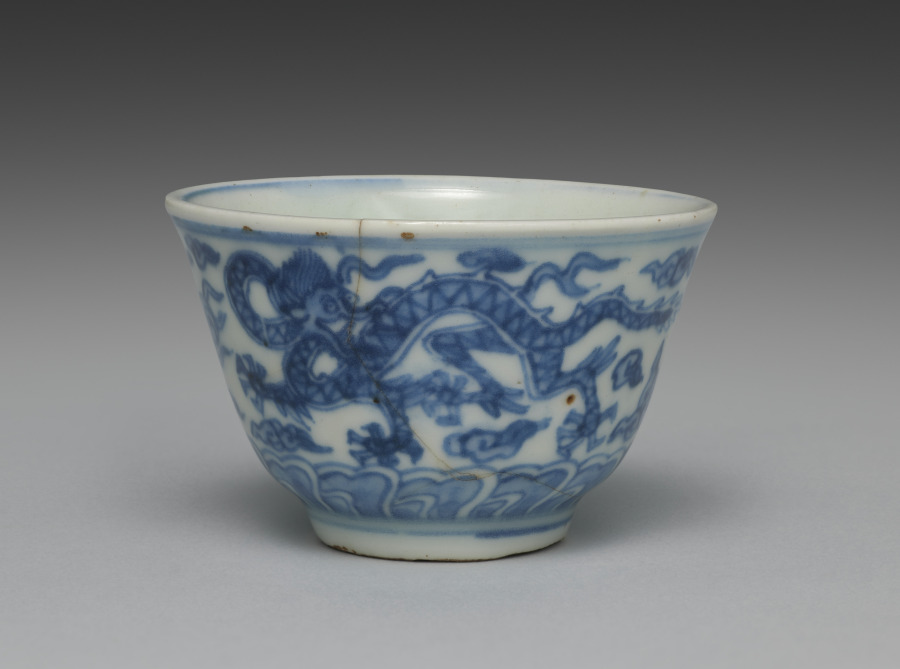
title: Cup from Tea Cups with Dragons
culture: Japan, Edo period (1615–1868)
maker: Seifū Yohei I (Japanese, 1801–1861)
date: 1840s–57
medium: One from a set of five tea cups; porcelain with underglaze blue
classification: Ceramic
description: Seifū Yohei I made both blue and white porcelains after Ming dynasty (1368–1644) Chinese wares fired in the kilns at Jingdezhen for export. He also made colorful stoneware in the style of his teacher, Nin’ami Dōhachi (Takahashi Dōhachi II) (1783–1855).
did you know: A small figure of an elephant serves as the handle for the lid.